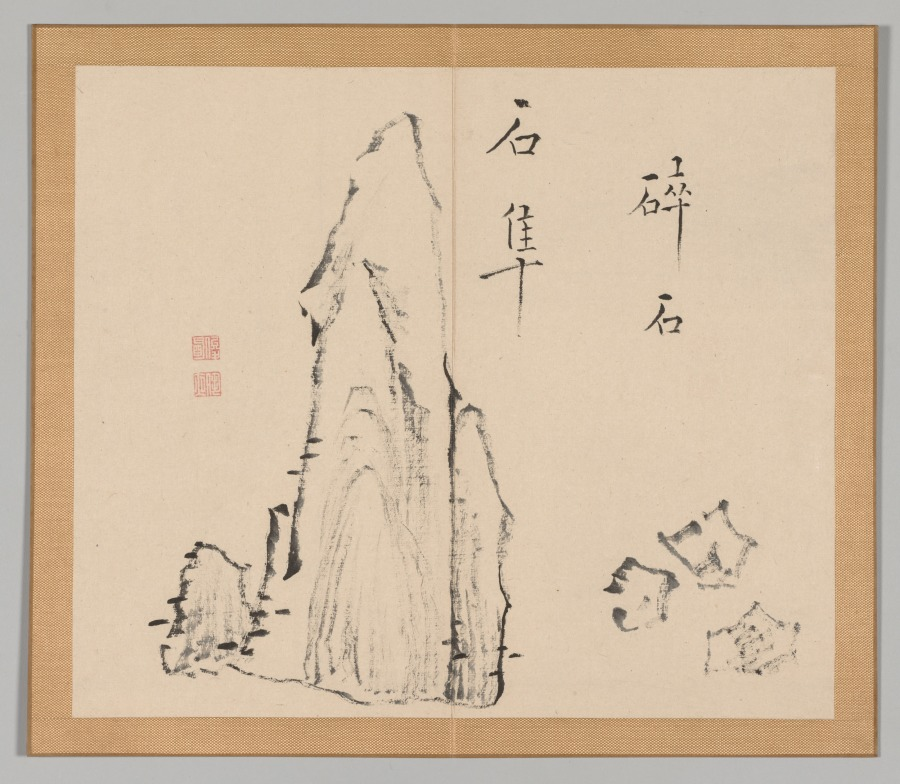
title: Reverberations of Taiga, Volume 1 (leaf 18)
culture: Japan, Edo period (1615–1868)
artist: Aoki Shukuya (Japanese, d. 1802)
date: mid- to late 1700s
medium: double-leaf from a pair of albums; ink and light color on paper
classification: Portfolio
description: Traditionally, young painters in Japan began their studies with an established master-painter. The master's compositions invariably became models that the apprentice copied to learn various ink and brush techniques. Shukuya was a pupil of the famous Kyoto artist Ikeno Taiga, whose style is reflected in these sketches of rocks, trees, and mountains.